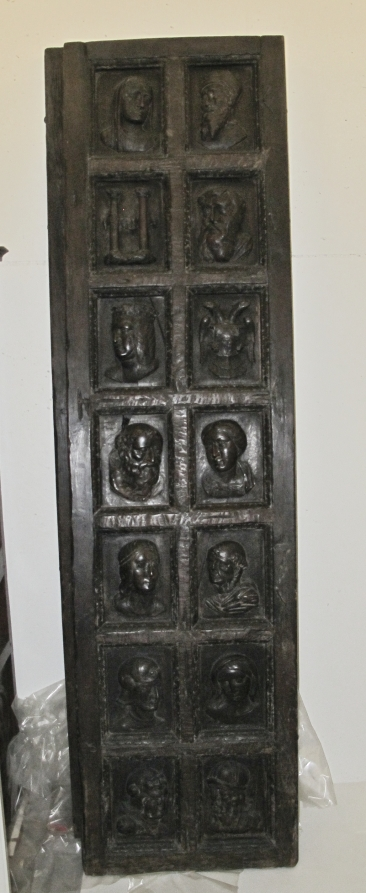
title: Studio Door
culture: Spain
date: 1500s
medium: wood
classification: Furniture and woodwork